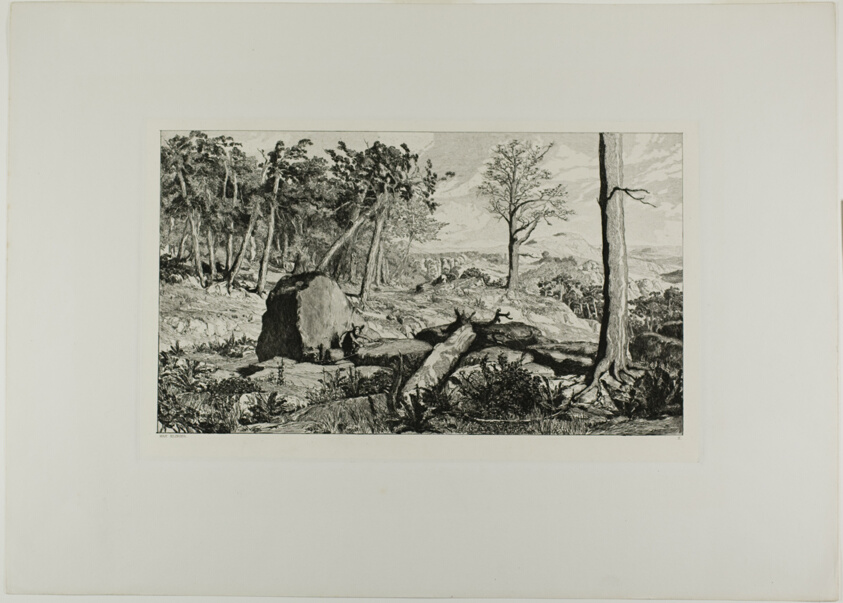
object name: Print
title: Simplicius in the Solitude of the Forest, plate ten from Intermezzos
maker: Max Klinger (German, 1857-1920)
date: 1881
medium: Etching on paper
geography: Germany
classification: etching; print; prints and drawing